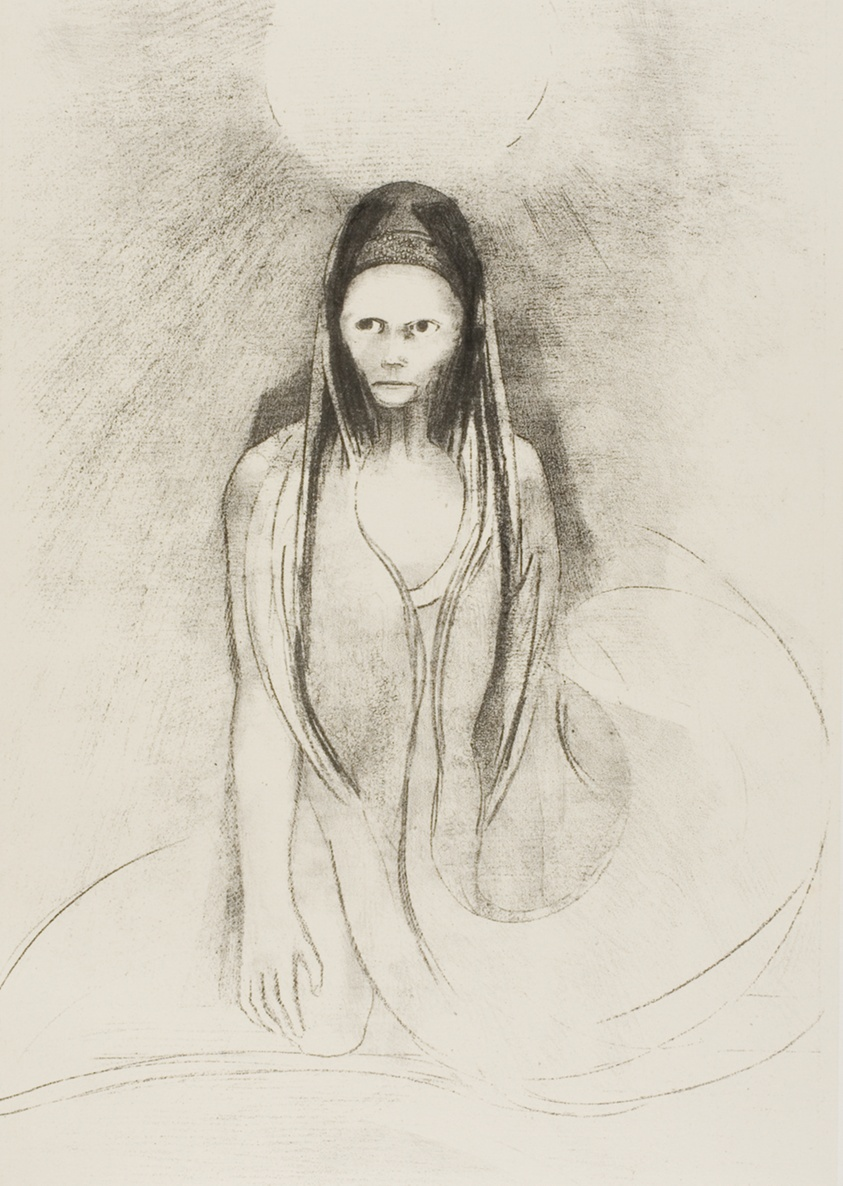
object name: Print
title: Intelligence was Mine! I Became the Great Buddha!, plate 12 of 24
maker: Odilon Redon (French, 1840-1916)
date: 1896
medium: Lithograph in black on yellow-cream China paper laid down on ivory wove paper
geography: France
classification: lithograph; print; prints and drawing; paper